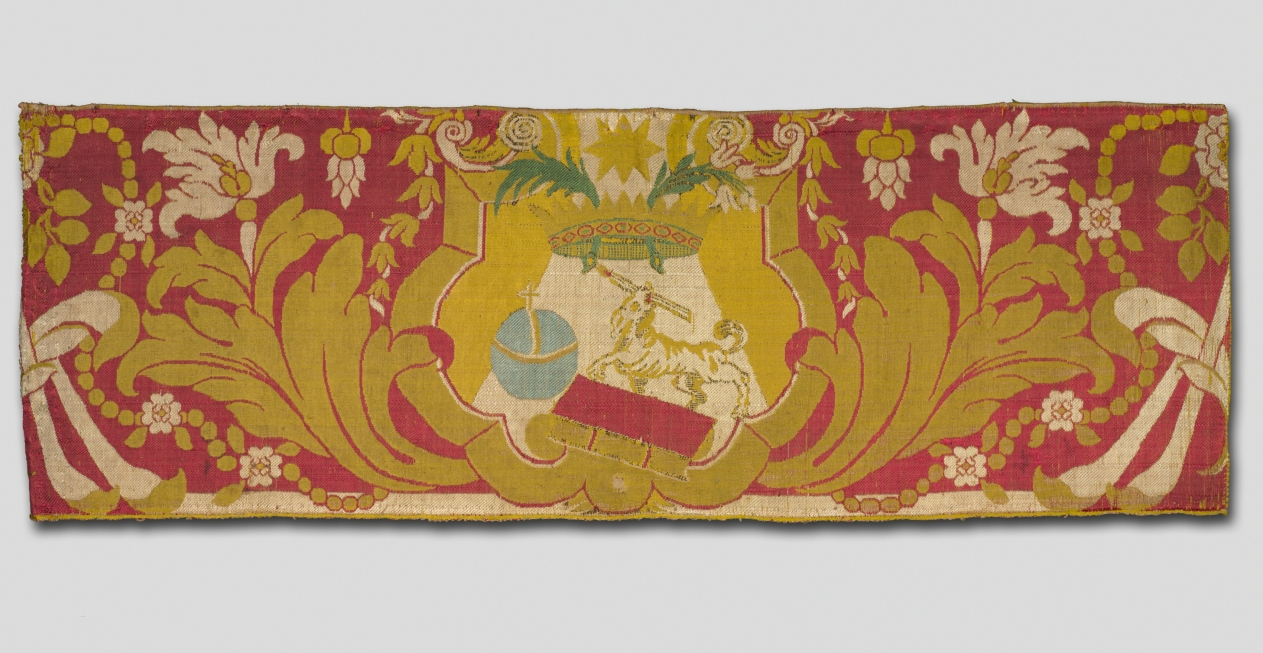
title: Textile Fragment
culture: Italy or Spain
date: 1600s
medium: brocaded silk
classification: Textile